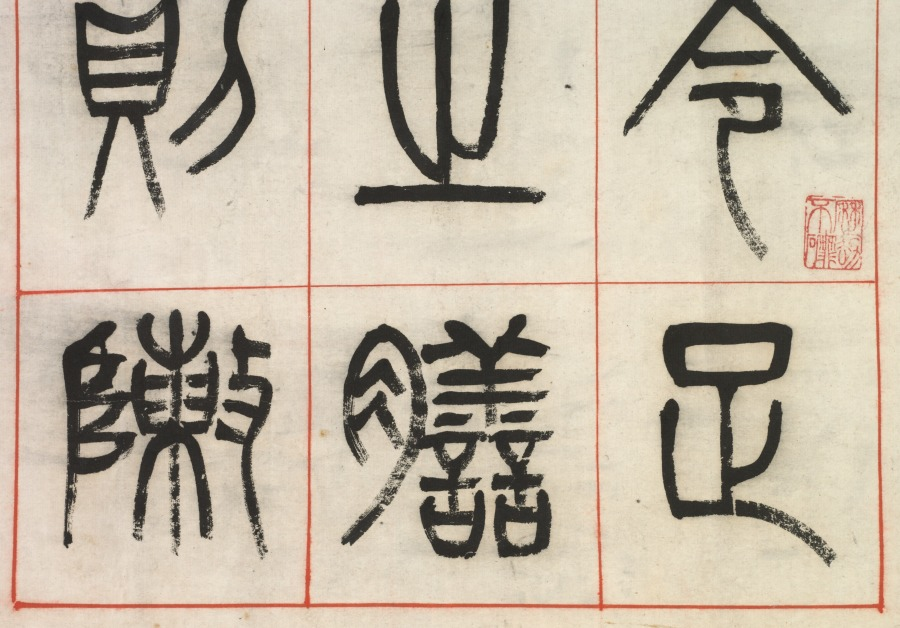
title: On Happiness, Calligraphy in Seal Script Style (zhuanshu)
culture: China, Changsu, Qing dynasty (1644-1911)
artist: Yang Yisun (Chinese, 1813–1881)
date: 1871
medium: hanging scroll, ink on paper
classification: Painting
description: Yang Yisun transcribed this ancient text on six narrow scrolls, starting at the top right and ending at the bottom left. Yang emphasizes the text’s historic nature by using the seal script style found on stone steles and bronze vessels. On Happiness features reflections of a scholar on a leisurely life in the countryside, composed by Han dynasty official Zhongchang Tong, who died the year the Han dynasty collapsed (AD 220). The idyllic life described in the text may bean evocation of the past in a time of national crisis. A decade before Yang wrote these scrolls, Anglo-French forces had looted and burned the Summer Palace in Beijing. At the same time, the domestic Taiping rebellion (1850–64), led by a religious fanatic to overthrow the Qing government, had devastated Yang’s homeland, the Jiangnan region, with an estimated 20 million lives lost.